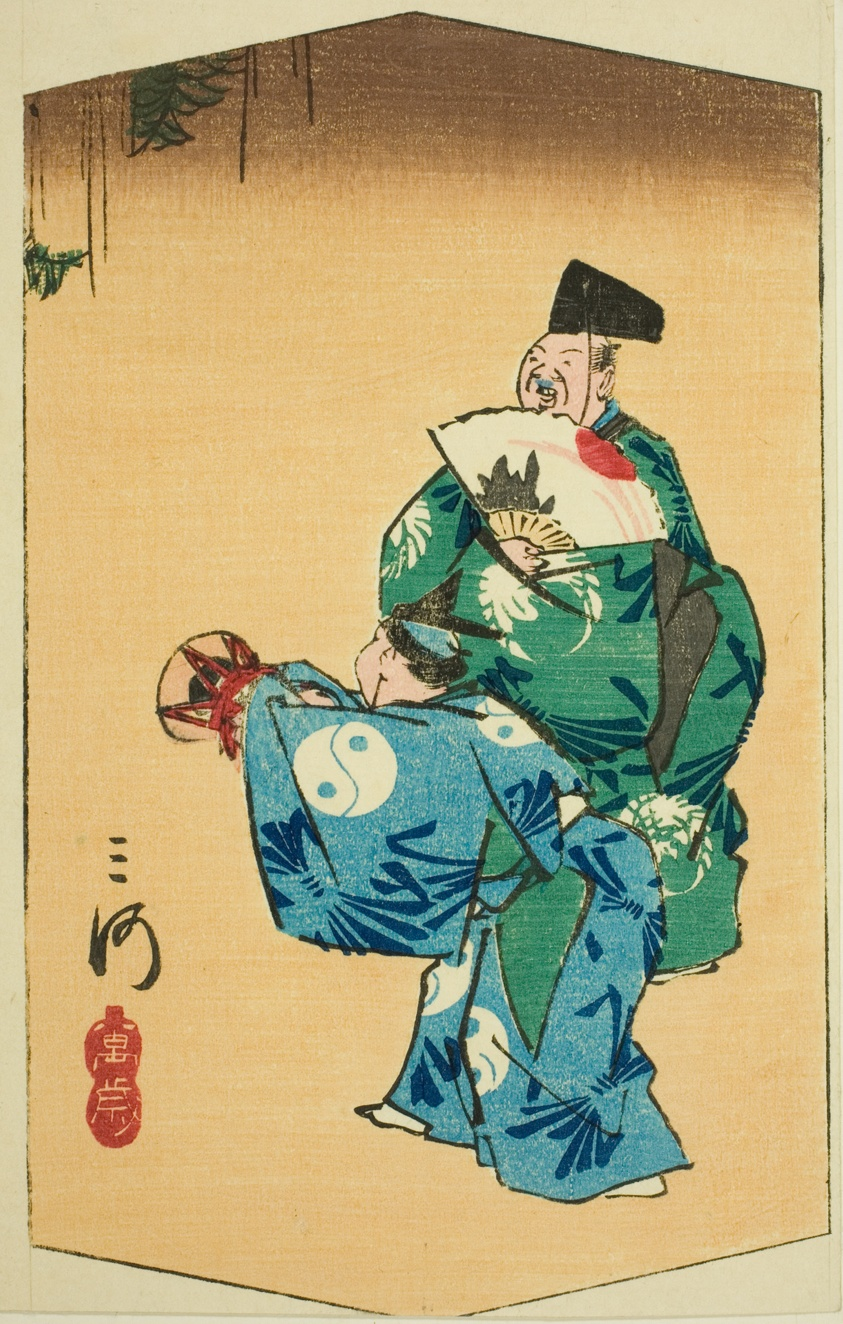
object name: Print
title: Comic Dancers in Mikawa Province (Mikawa, manzai), section of sheet no. 4 from the series "Cutout Pictures of the Provinces (Kunizukushi harimaze zue)"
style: Japanese (culture or style)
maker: Utagawa Hiroshige 歌川 広重; Japanese, 1797-1858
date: 1852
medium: Color woodblock print; section of harimaze sheet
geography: Japan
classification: woodblock print; print; asian art